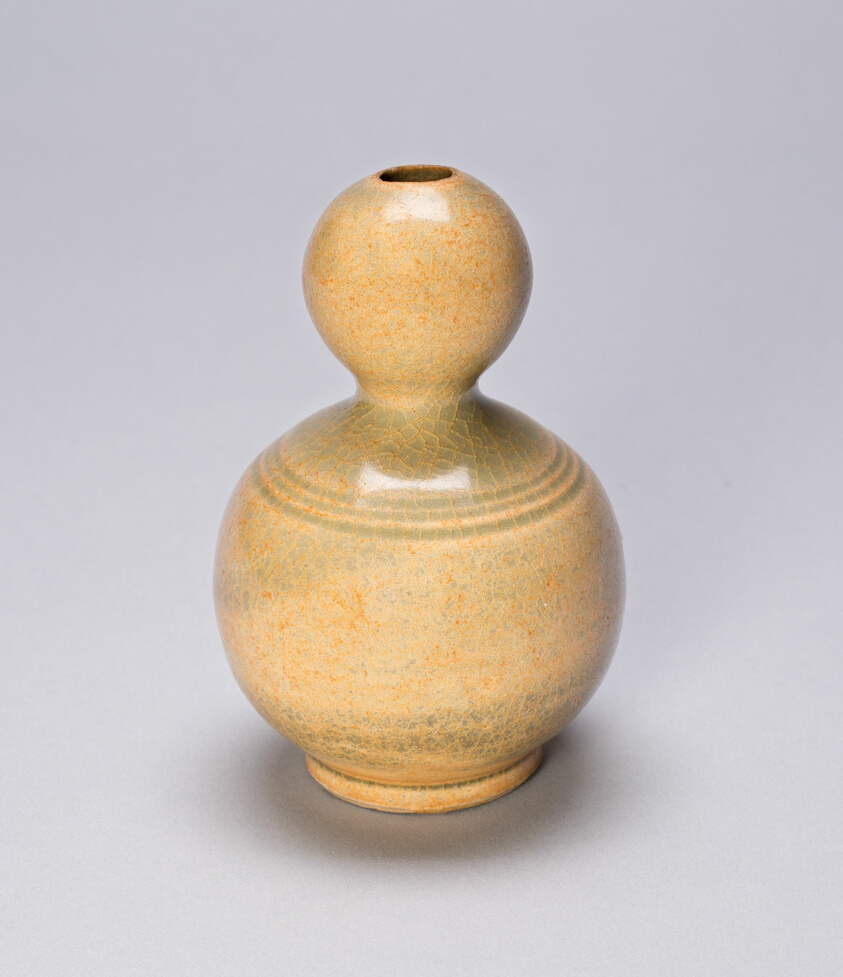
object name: Decorative Arts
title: Small Double-Gourd Bottle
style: Chinese (culture or style)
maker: China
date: Southern Song dynasty (1127–1279)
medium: Stoneware with underglaze incised decoration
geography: China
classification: ceramics; decorative arts